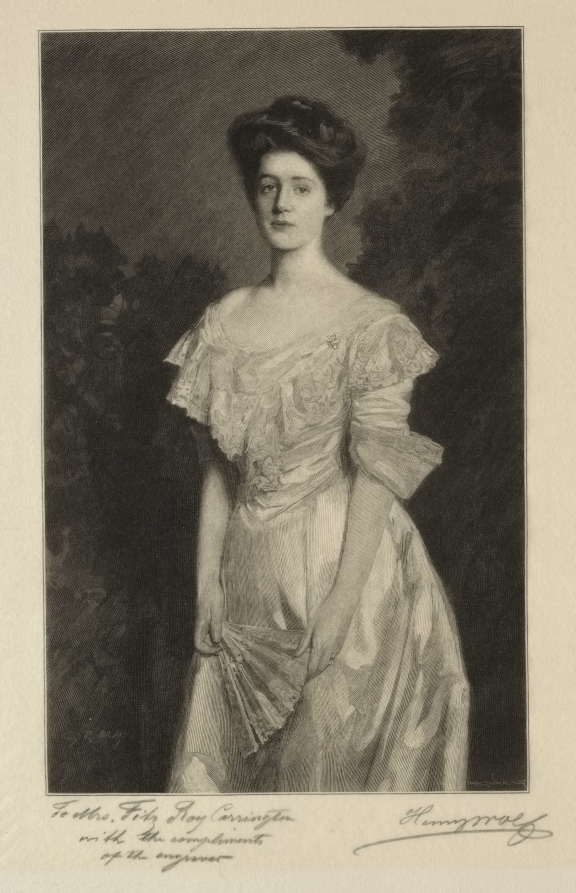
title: Mrs. Cowperthwait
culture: America, late 19th-early 20th century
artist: Henry Wolf (American, 1852–1916)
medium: wood engraving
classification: Print